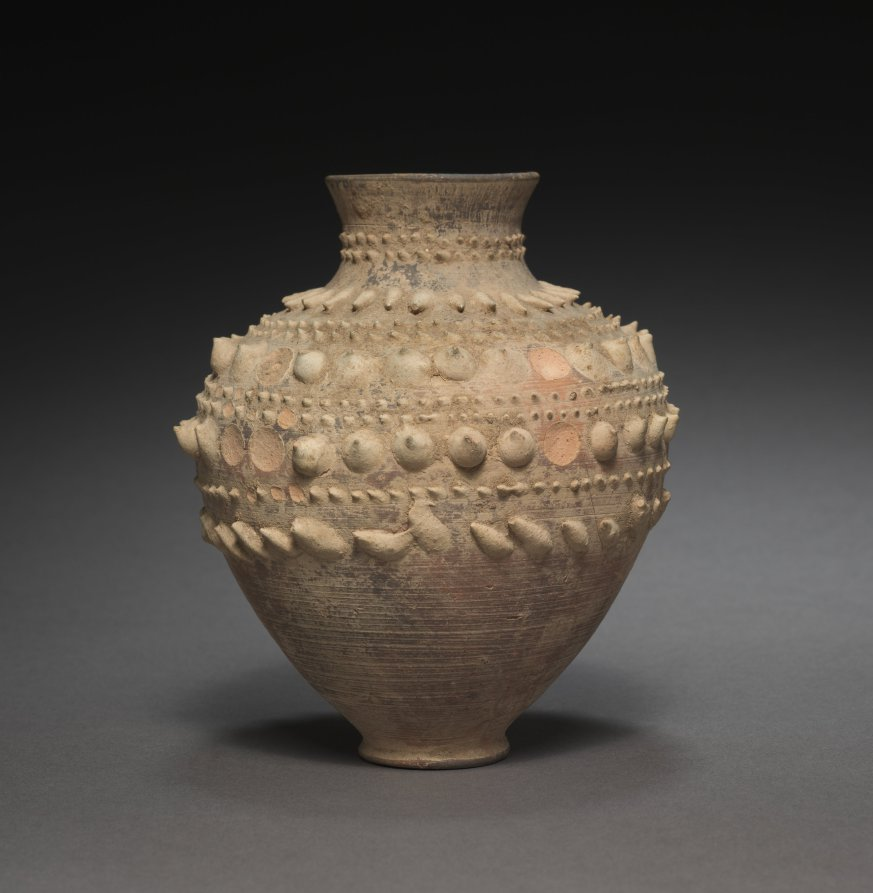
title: Barbotine Vase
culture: Egypt, Greco-Roman period (332 BCE–395 CE), Roman empire (30 BCE–395 CE)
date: 1–300 CE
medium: Marl clay ware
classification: Vessels